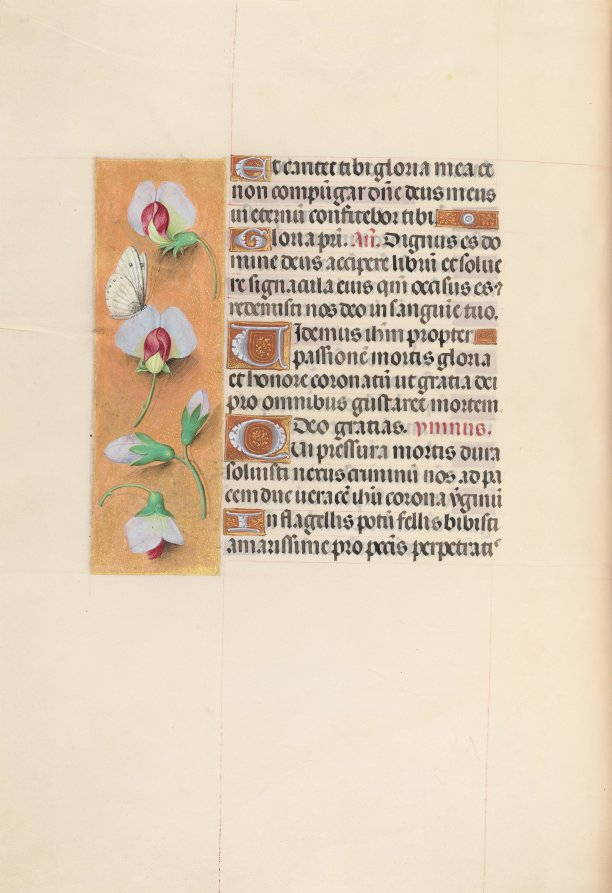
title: Hours of Queen Isabella the Catholic, Queen of Spain: Fol. 74v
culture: Flanders, Ghent and Bruges, late 15th century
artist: Master of the First Prayerbook of Maximillian (Flemish, c. 1444–1519)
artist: and Associates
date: c. 1500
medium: ink, tempera, and gold on vellum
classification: Bound Volume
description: This manuscript was illuminated by a circle of at least five highly organized manuscript painters active in the Flemish cities of Ghent and Bruges. The principal illuminator was Alexander Bening, who painted the majority of the book's miniatures. Manuscripts produced by this circle of artists are renowned for the decoration of their borders, which typically feature a rich variety of realistically-painted flowers, birds, and butterflies. This prayer book, called a book of hours, was intended not for a cleric, but for the private devotions of a lay person-in this case, Isabella the Catholic, Queen of Spain (1451-1504). Isabella's coat of arms embellishes the book's frontispiece. It is unlikely that the book was commissioned by the Queen herself; rather, she probably received it as a diplomatic gift from someone courting her patronage, perhaps Cardinal Francisco Jimenez de Cisneros. A Franciscan friar, Jimenez was dependent upon Isabella for his advancement, first to the post of Queen's confessor in 1492, and then to Archbishop of Toledo in 1495.